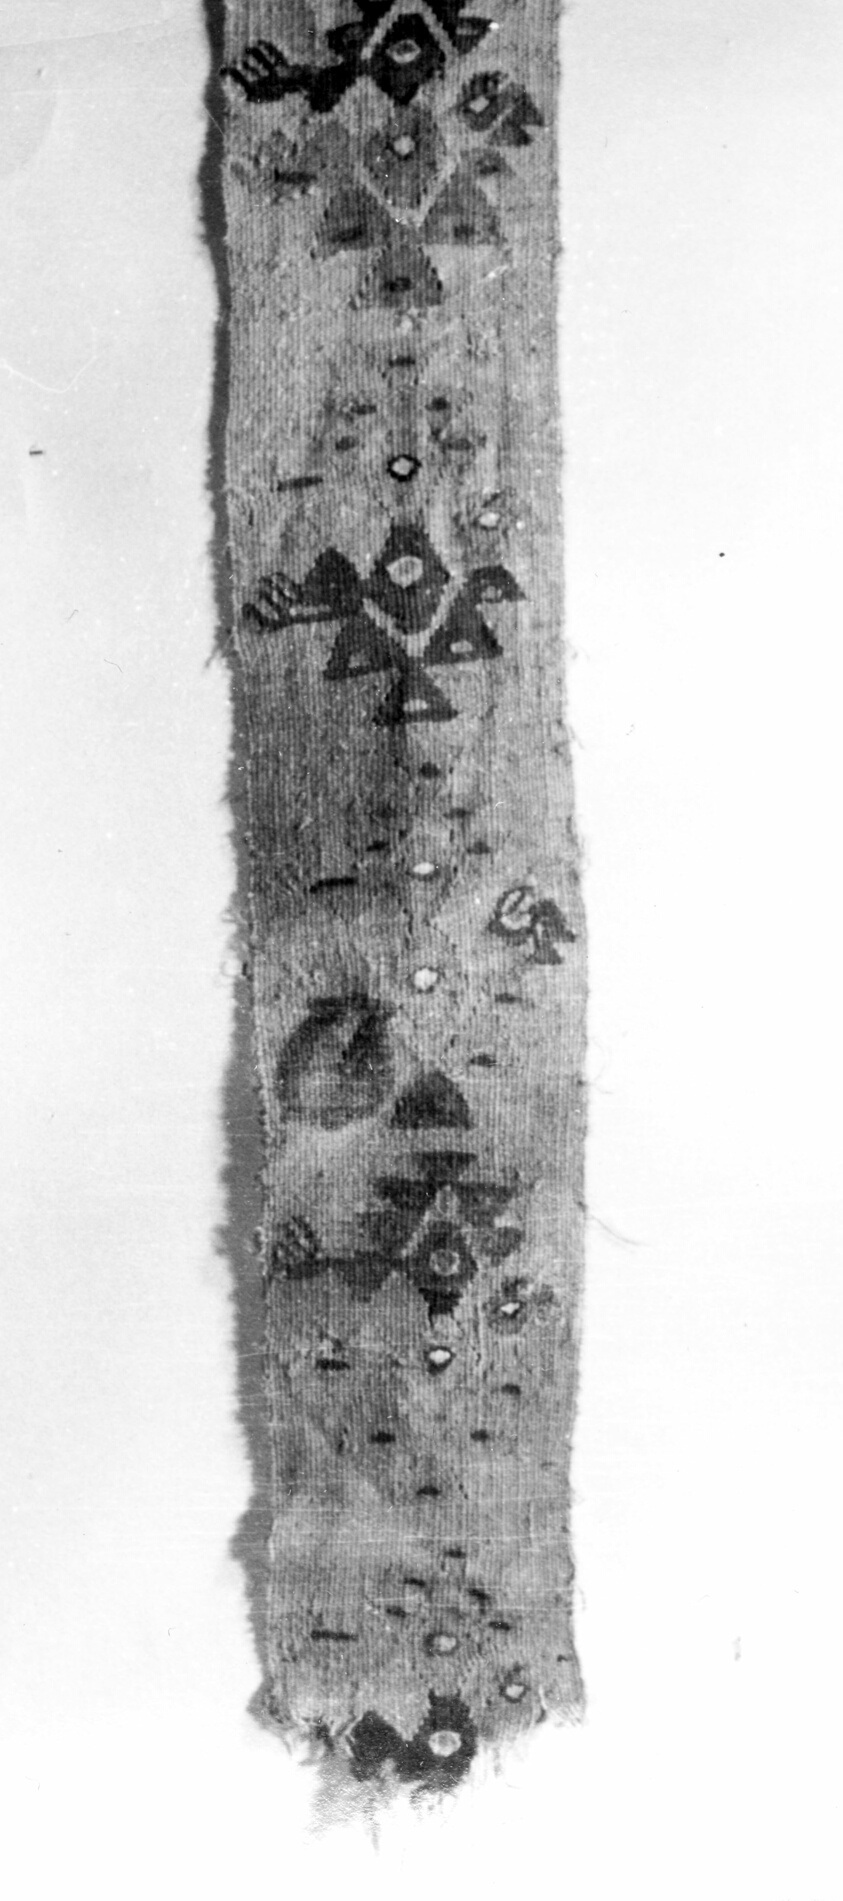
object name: Textile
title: Fragment (Band)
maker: Probably central coast, Peru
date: A.D. 1000/1476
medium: Slit tapestry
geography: Peru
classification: textile; weaving